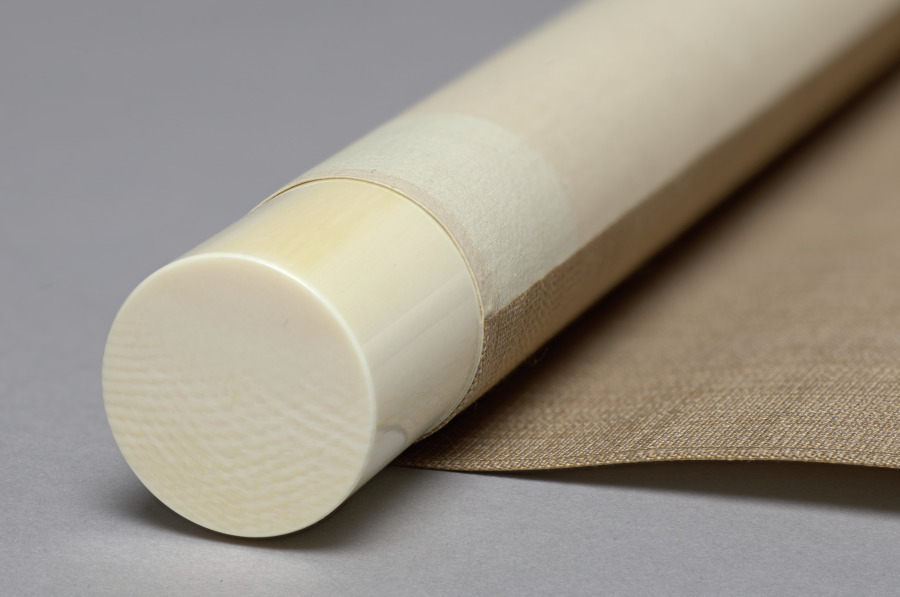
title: Pleasure Boat on the Sumida River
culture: Japan, Edo period (1615–1868)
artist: Teisai Hokuba (Japanese, 1771–1844)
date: 1800s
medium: Hanging scroll; ink and color on silk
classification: Painting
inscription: Signed: Teisai. Sealed: Teisai go [no] in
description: After a major fire in Edo (now Tokyo), the Yoshiwara licensed brothel district was relocated to an area accessed via boat along the Sumida River, giving rise to many compositions depicting travel there. Here, attendants with checkered robes serve refreshment to a client. A figure at the fore of the boat tends to the kitchen. A courtesan at the aft, or rear, surveys the river scene. Acquaintances converse in modest commuter boats, and fishers put in to a tiny island. The boat is near the entrance to the San’ya Canal, where pleasure-seekers would disembark.